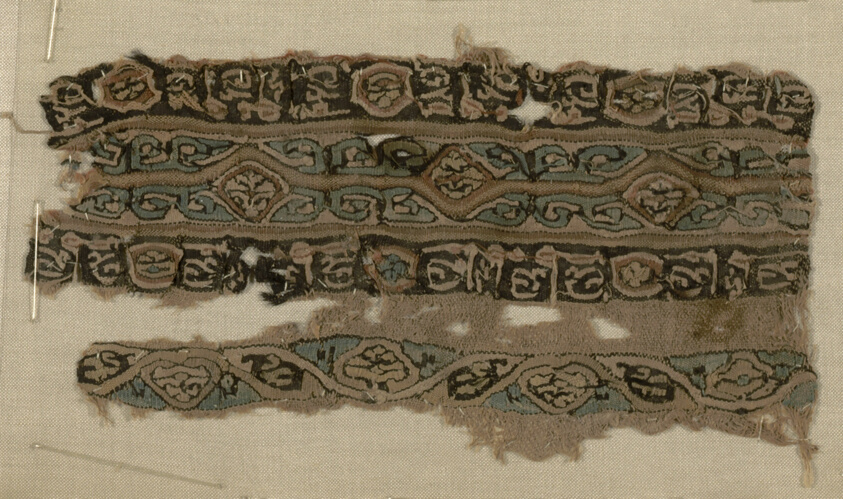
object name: Textile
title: Borders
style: fatimid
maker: Egypt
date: Fatimid period (969–1171)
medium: Linen and silk, tapestry weave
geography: Egypt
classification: textile; weaving